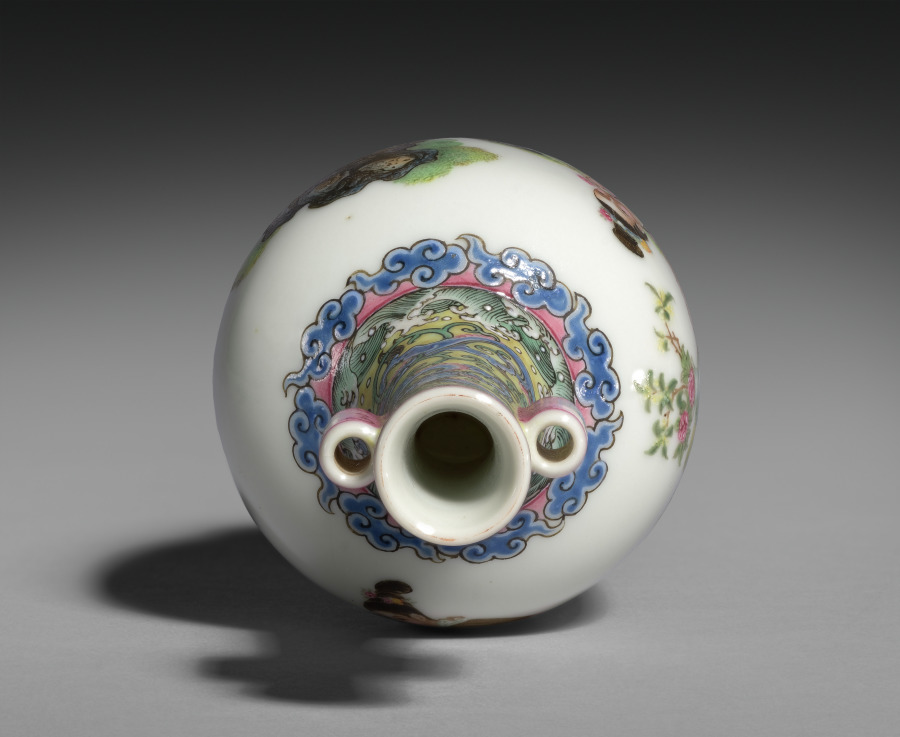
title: Vase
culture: China, Qing dynasty (1644-1911), Qianlong mark and reign (1736-95)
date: 1736–95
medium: Porcelain with decoration in colored fa-lang enamels, Guyuexuan ware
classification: Ceramic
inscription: 乾隆年製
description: The four-character mark on the base of this vase indicates that it was made in Jingdezhen and then sent to Beijing to be decorated in the imperial workshops by painters who were trained in using Western perspective and shading.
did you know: The child in orange has a bun above his ear, while the rest of his head is clean-shaven, like the other children’s.